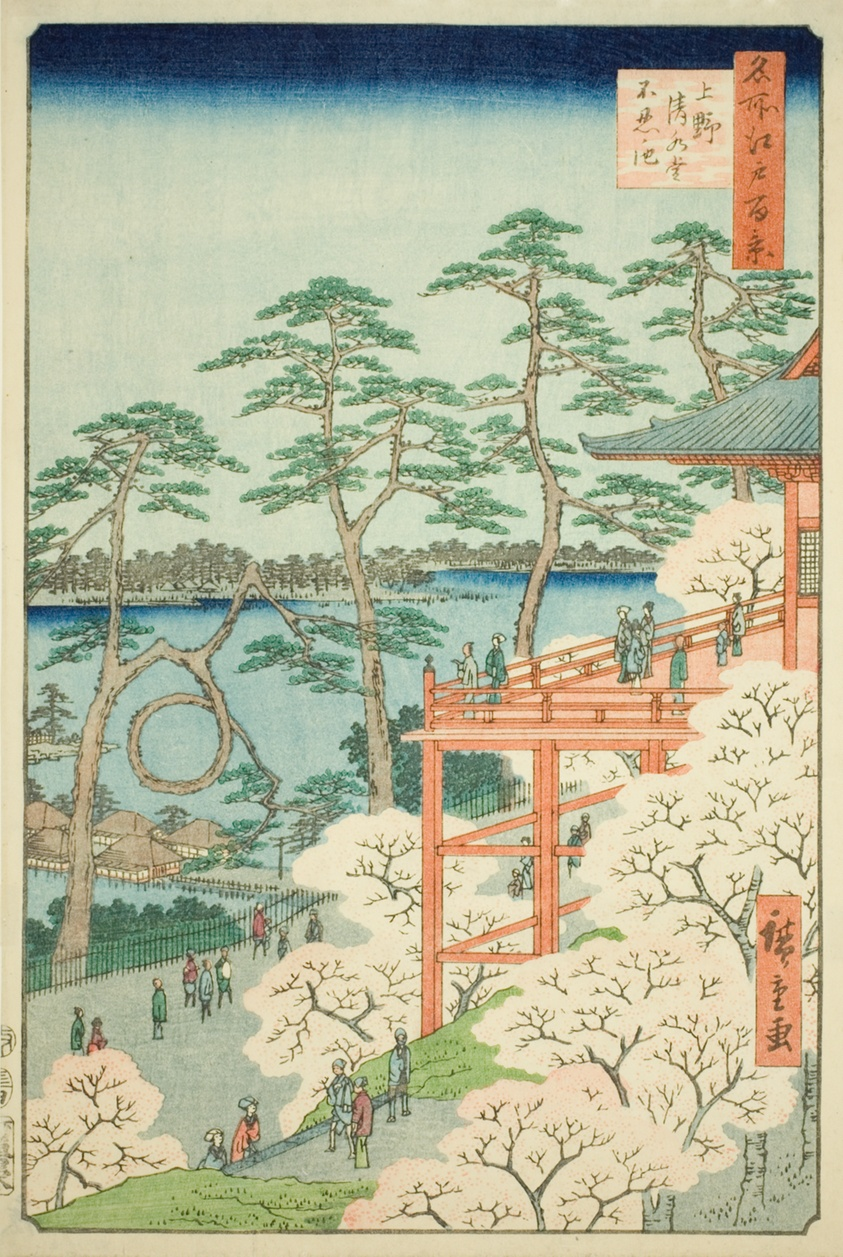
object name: Print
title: Kiyomizu Hall and Shinobazu Pond at Ueno (Ueno Kiyomizudo Shinobazu no ike), No.11 from the series "One Hundred Famous Views of Edo (Meisho Edo hyakkei)"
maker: Utagawa Hiroshige (Japanese, 1797-1858)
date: 1856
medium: Color woodblock print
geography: Japan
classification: woodblock print; print; asian art